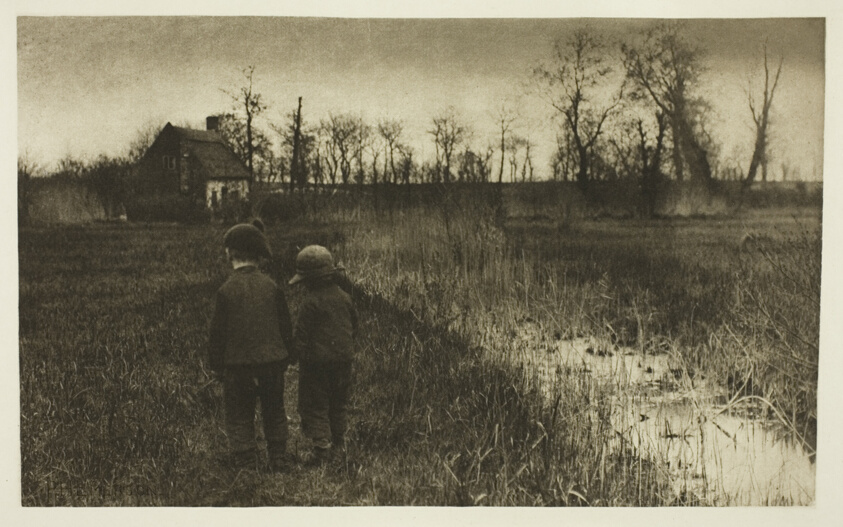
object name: Photograph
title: A Toad in the Path: Early Spring in Norfolk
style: 19th century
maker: Peter Henry Emerson (English, born Cuba, 1856–1936)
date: c. 1883/87, printed 1888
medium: Photogravure, pl. XXVII from the album "Pictures of East Anglian Life" (1888)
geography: England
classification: photogravure; photomechanical process; photography; photograph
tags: Collected by Hugh Edwards, Pictures of East Anglian Life, Seat of War in the Crimea